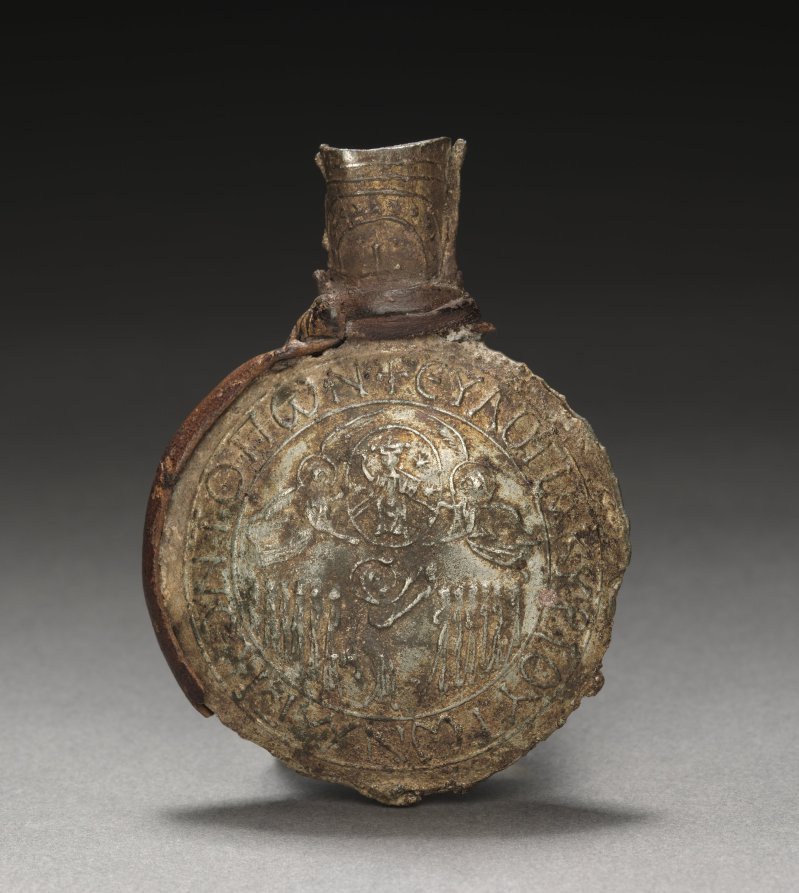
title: Pilgrim's Ampulla with the Ascension (back)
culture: Byzantium; Palestine, early Byzantine period, early 7th Century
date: c. 600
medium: tin-lead alloy with leather fragments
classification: Metalwork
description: The images found on the sides of surviving lead pilgrims' ampullae include scenes relating to the life of Christ, and by extension to the holy sites (loca sancta) where the events took place. Cast into the sides of this ampulla are scenes of Christ's Crucifixion on the front and the Ascension on the back. The use of such sacred images on these vessels illustrates the early Christian belief that images were carriers of divine power. This ampulla is known as a "Monza" or "Bobbio" type after caches of similar examples discovered in those two Italian towns.